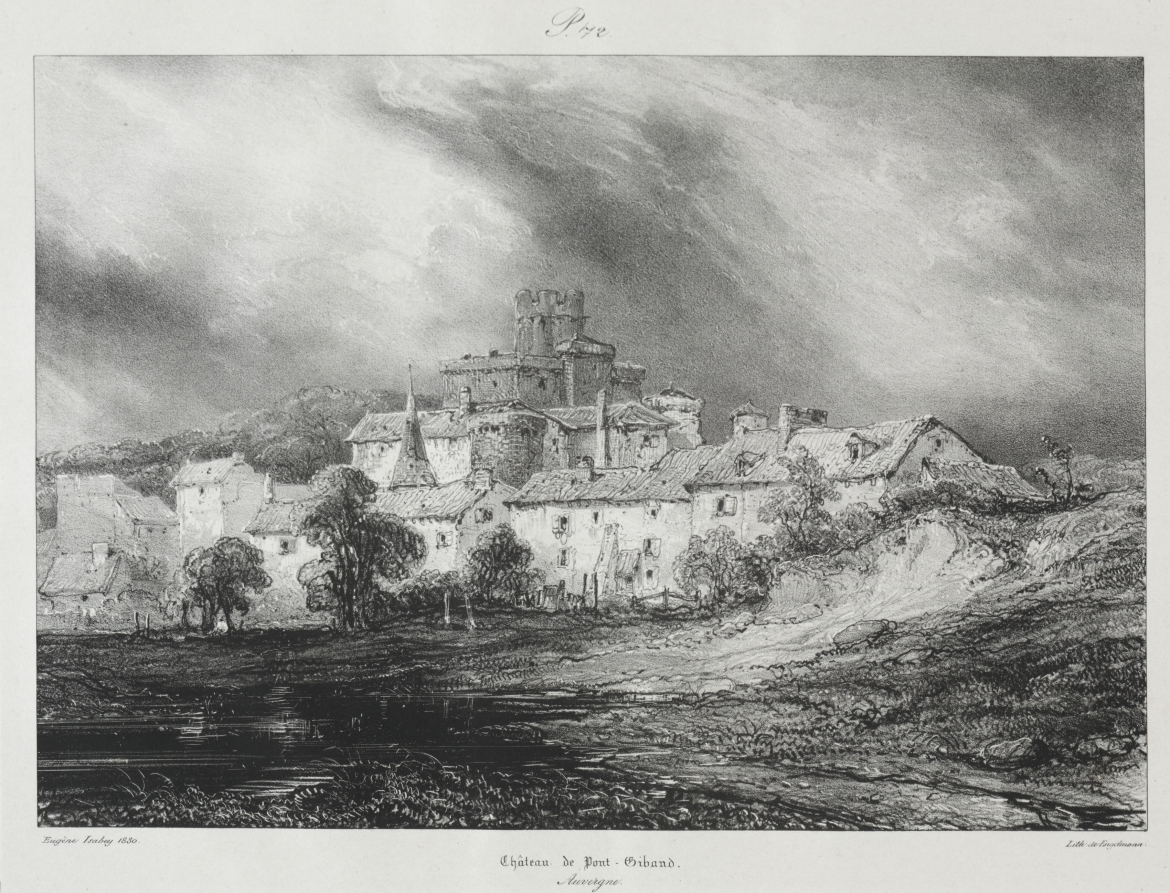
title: Voyages pittoresques et romantiques dans l'ancienne France, Auvergne: Château de Pont-Gibaud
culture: France, 19th century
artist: Eugène Isabey (French, 1803–1886)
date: 1830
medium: lithograph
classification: Print